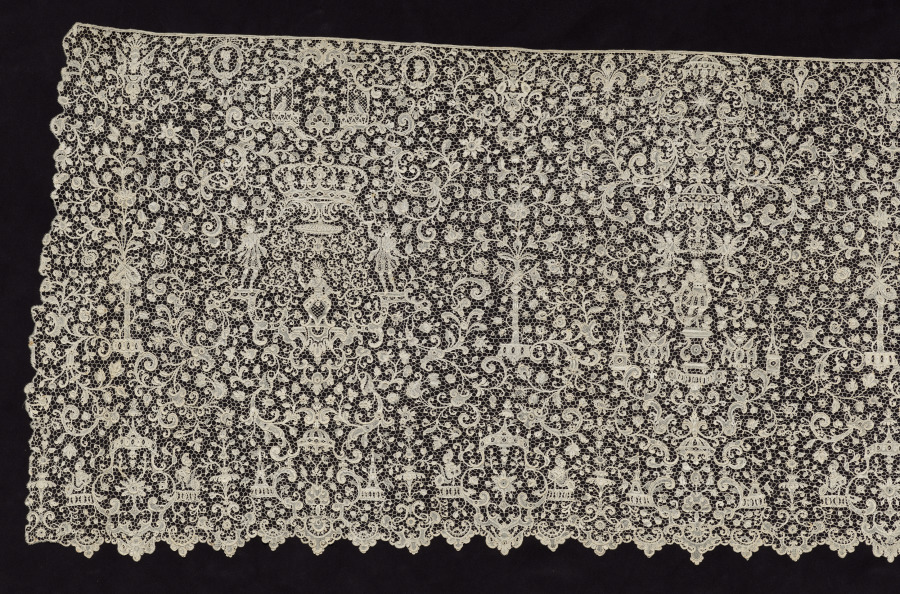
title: Lace Flounce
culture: France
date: 1700–1715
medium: Needle lace (Point de France)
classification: Lace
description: Other pieces of this lace (or ones very similar) are in the Rijksmuseum, Amsterdam; the Isabella Stewart Gardner Museum, Boston; and the Baltimore Museum of Art.